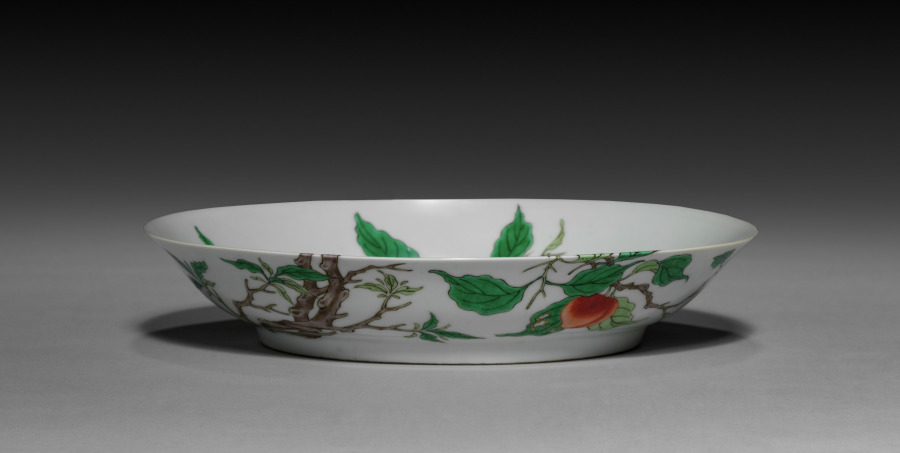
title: Dish with Bird on Fruit Tree Branch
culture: China, Jiangxi province, Jingdezhen kilns, Qing dynasty (1644–1911), Kangxi mark and reign (1662–1722)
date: 1662–1722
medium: Porcelain with famille-verte overglaze enamel decoration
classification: Ceramic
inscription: 大清康熙年制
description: Among the greatest achievements of early Qing porcelain are table wares and display objects decorated with polychrome painting like this pair of dishes. Featuring birds perched in peach trees, the dishes are related to the famous birthday set commissioned for the Kangxi emperor’s sixtieth birthday in 1713. These pieces are more inventive than those in the 1713 set, however, since the unframed ornament is allowed to continue unbroken from the outer to inner surfaces and back out again, thus transforming each vessel into a three-dimensional canvas.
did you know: By the early eighteenth century, the imperial kilns at Jingdezhen were producing exceptionally fine pieces on a staggering scale.